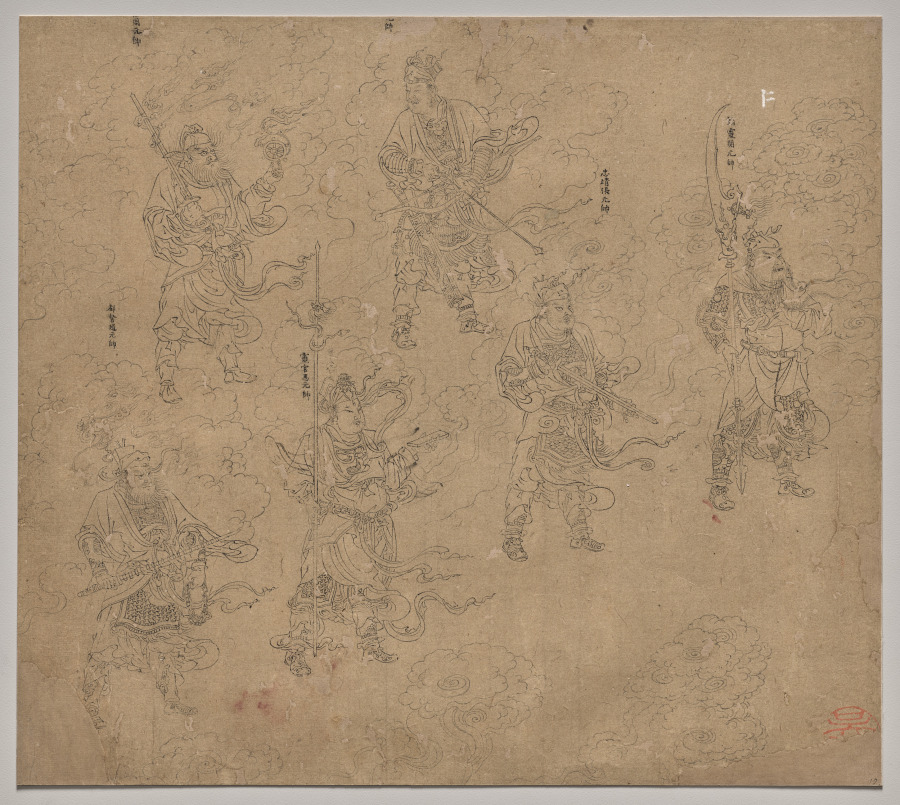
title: Album of Daoist and Buddhist Themes: Procession of Daoist Deities: Leaf 12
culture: China, Southern Song dynasty (1127-1279)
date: 1200s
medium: Album, ink on paper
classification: Painting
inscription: 朗靈關元帥; 忠靖張元帥; 元帥; 靈官馬元帥; 風輪周元帥; 都督趙元帥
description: This section of the Daoist pantheon depicts six generals, five of whom are identifiable by inscriptions. Starting from the right, they are Guan Yü 關羽, Zhang Bo 張渤, a general whose label has been lost, Ma Lingyao 馬靈耀, Zhou Guangze 周廣澤, and Zhao Gongming 趙公明. The generals, clad in military gear and wielding weapons, command spirit armies to intimidate and destroy demons that cause sickness and misfortune.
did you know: At far left, the God of Wealth Zhao Gongming holds a golden rod.